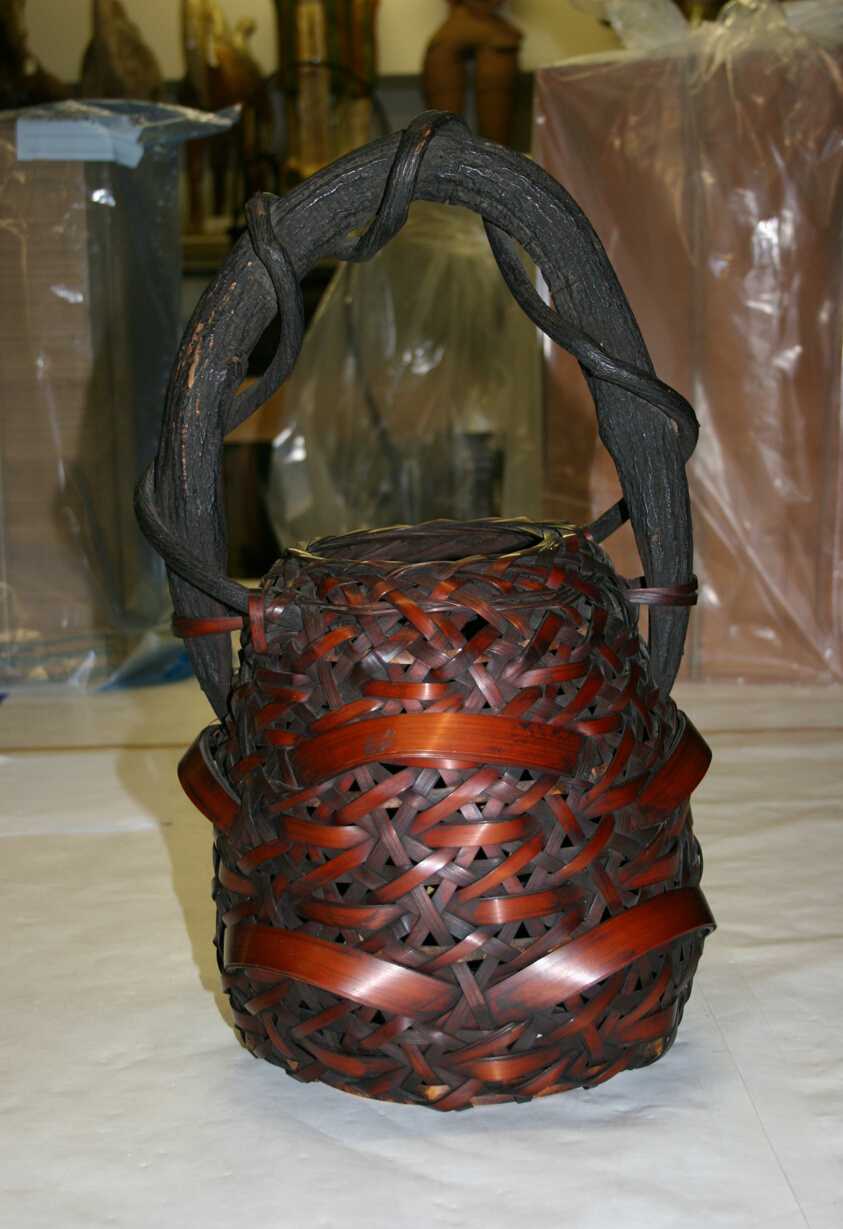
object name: Decorative Arts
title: Tall Globular Basket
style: Japanese (culture or style)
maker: Japan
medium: Bamboo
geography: Japan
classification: basketry; decorative arts